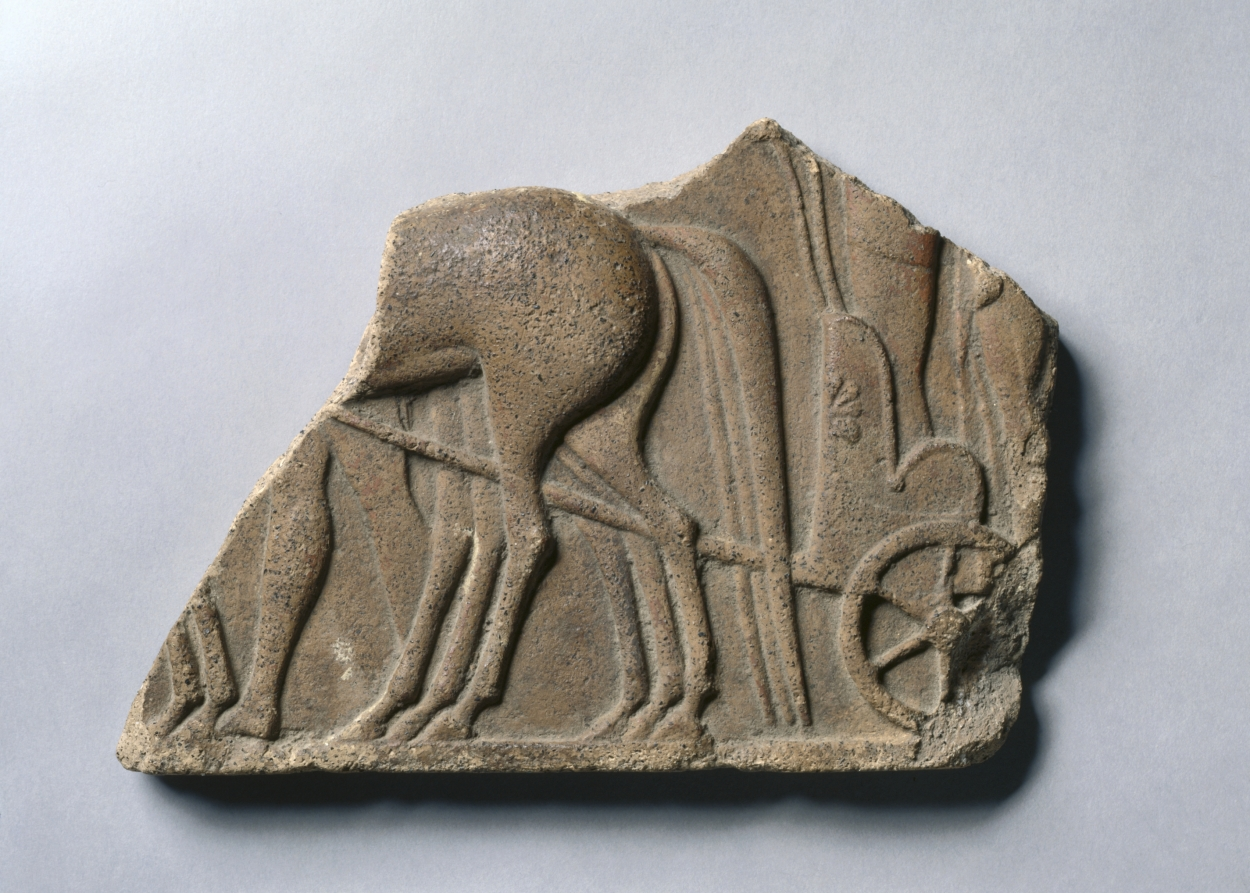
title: Plaque Fragment of Horses and Chariot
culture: Etruscan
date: 500–475 BCE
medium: terracotta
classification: Sculpture